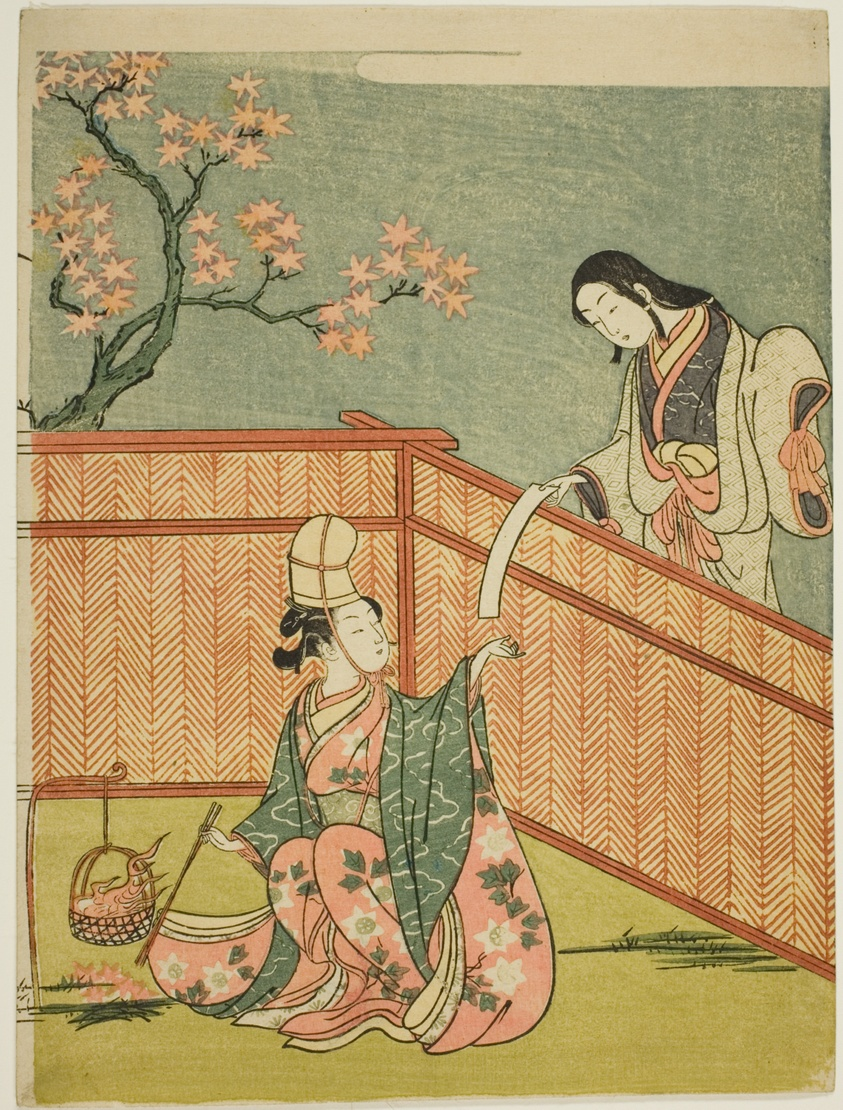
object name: Print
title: Burning Autumn Maple Leaves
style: Japanese (culture or style)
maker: Suzuki Harunobu 鈴木 春信; Japanese, 1725 (?)-1770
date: 1765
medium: Color woodblock print; chuban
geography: Japan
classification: woodblock print; print; asian art